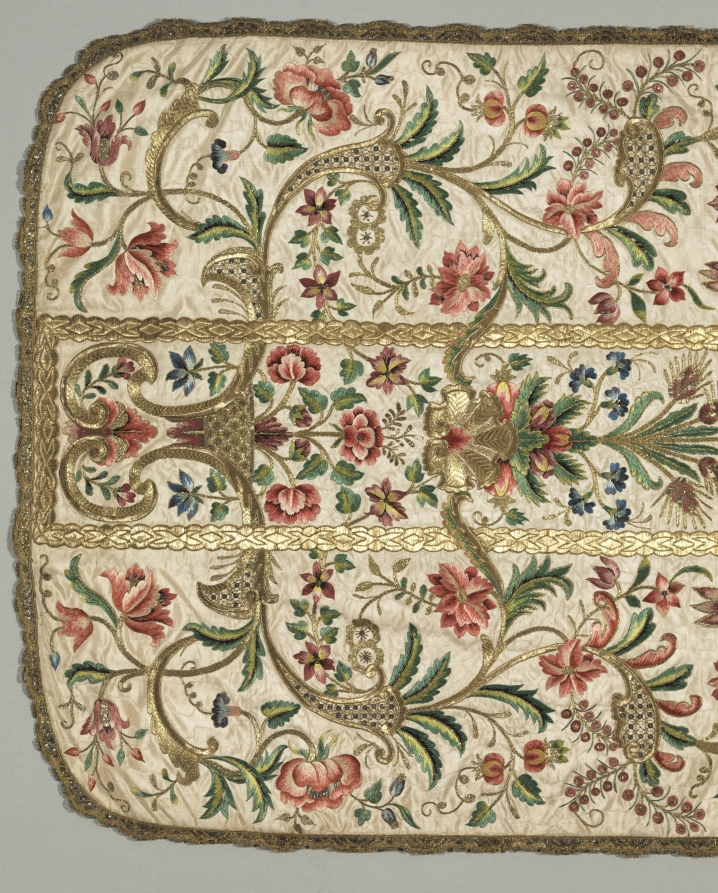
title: Chasuble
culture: Italy, 18th century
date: 1700s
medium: Silk and metallic threads; embroidery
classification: Textile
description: A beautiful design emanates from a vase in the center of this chasuble, displaying symmetrical flora that extend across embroidered gold braids into graceful curvilinear cartouches, reflecting contemporary architectural decoration. Also in the center, sheaves of wheat and grapes represent the bread and wine of the Mass. Gold sequins within thread-outlined squares illustrate fine quality workmanship. The decoration of the stole and chalice veil is similar to the chasuble, also on moiré (watered) silk fabric. The stole, an insignia of the office of deacons and priests, is worn under a chasuble, and the chalice veil—bearing the monogram of Jesus Christ, ihs, in the center—covers the chalice and paten (the plate holding the Eucharistic bread).